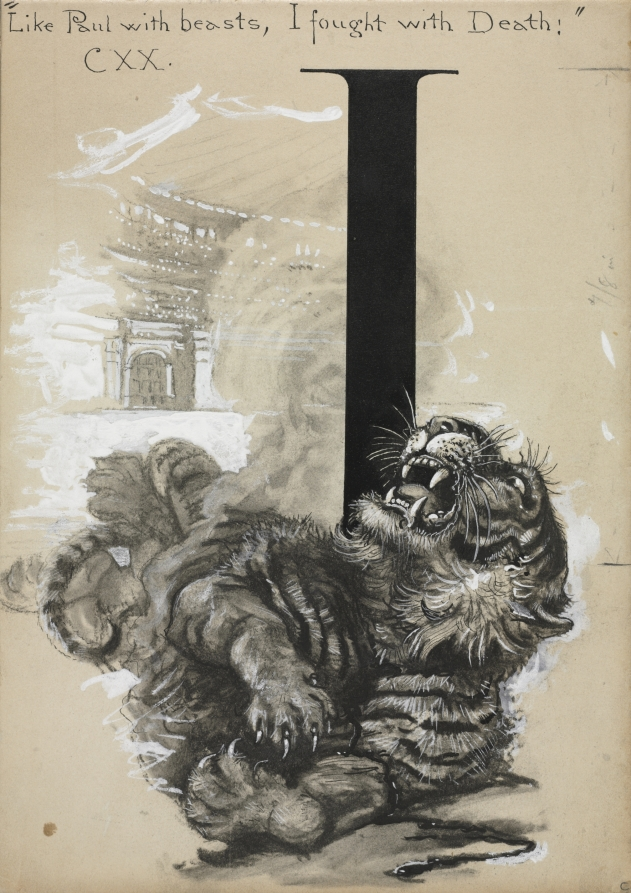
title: Tiger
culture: America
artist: Harry Fenn (American, 1838/45–1911)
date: before 1897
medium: pen and ink, brush and wash, heightened with white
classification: Drawing